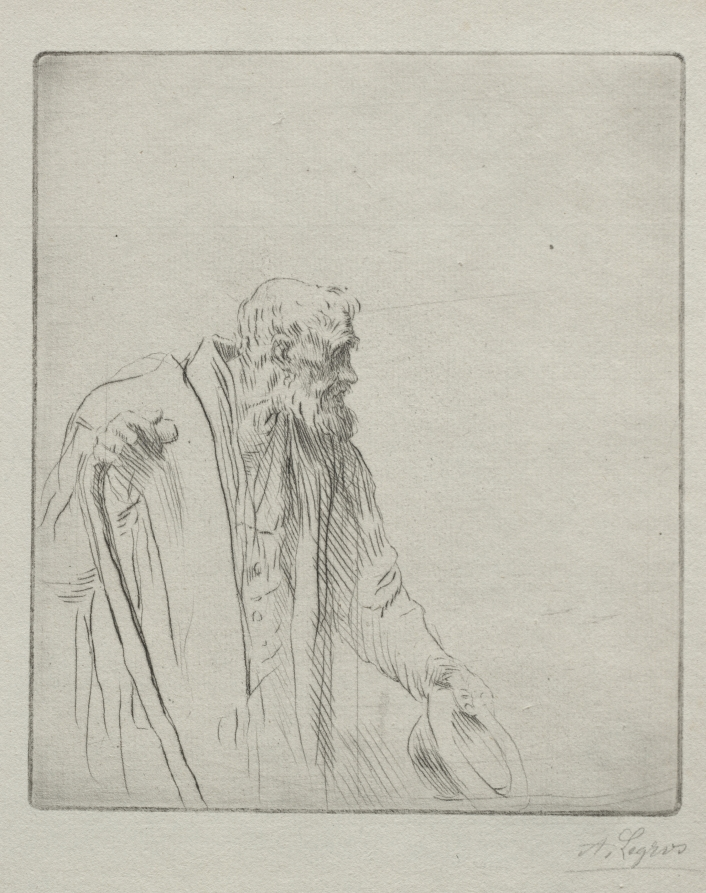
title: A Beggar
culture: France, 19th century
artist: Alphonse Legros (French, 1837–1911)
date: c. 1857–1911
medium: drypoint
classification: Print